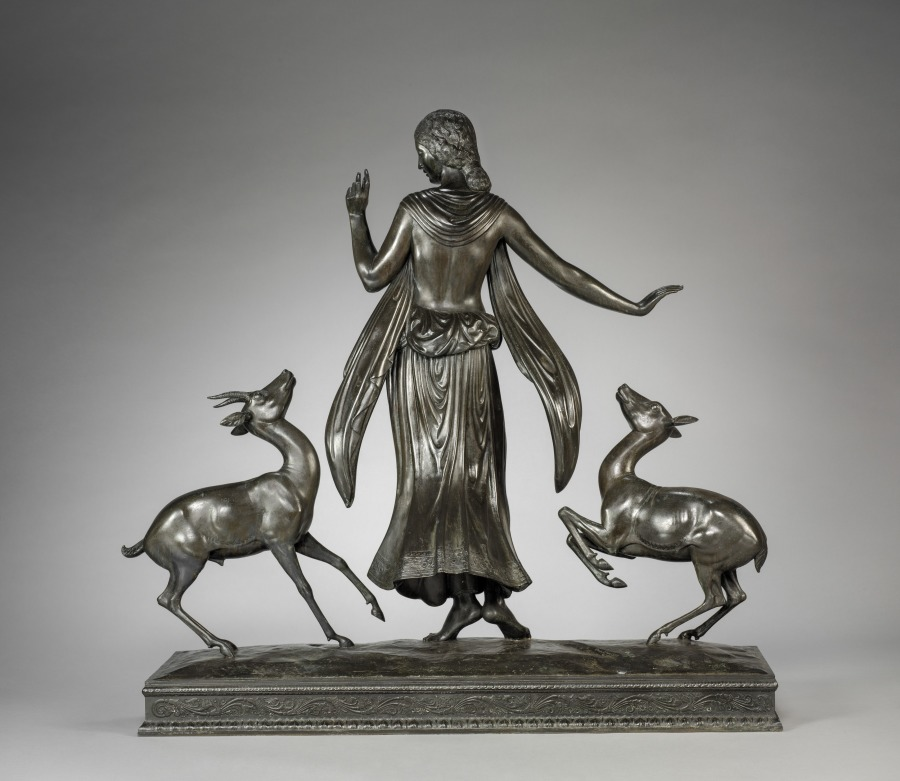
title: Dancer and Gazelles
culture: America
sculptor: Paul Manship (American, 1885–1966)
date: 1916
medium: bronze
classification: Sculpture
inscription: Signed on base: PAUL MANSHIP © 1916.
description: One of Manship’s most popular compositions, this work established his reputation as an important up-and-coming sculptor. Here, his mastery of elegant silhouette is manifest through the gracefully posed dancer and her sleek animal companions. Stylized decorative patterning embellishes the dancer’s hair and swaying skirt.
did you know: Initially interested in painting, Manship opted to pursue sculpture after discovering he had color vision deficiency.